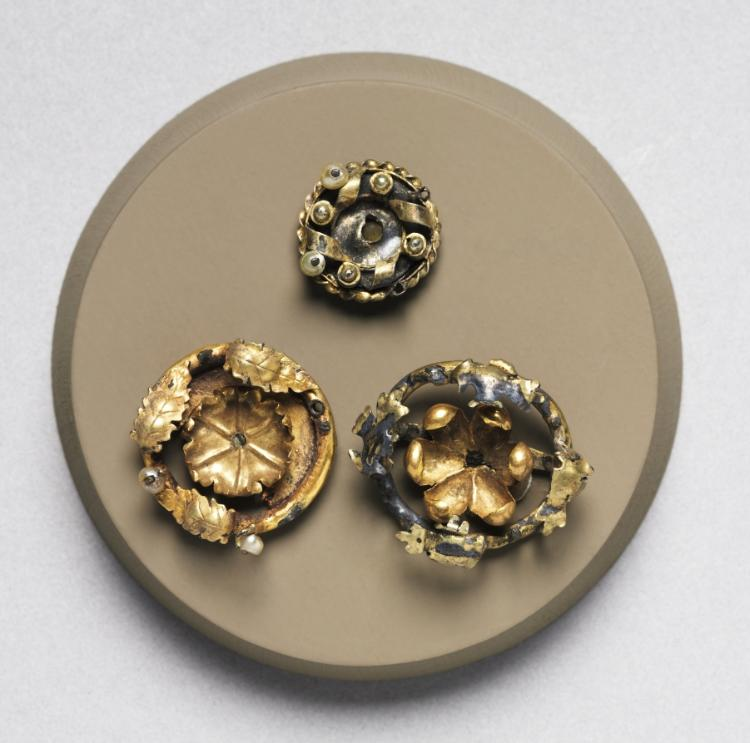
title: Brooch (Element of Garment Clasp)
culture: France, Paris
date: c. 1400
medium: gold, gilt silver and pearls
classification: Jewelry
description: During the 1300s, brooches like this were ordinarily worn at the neck to clasp a lady's cloak or dress. They could also be sewn into a garment or hat as an ornament.